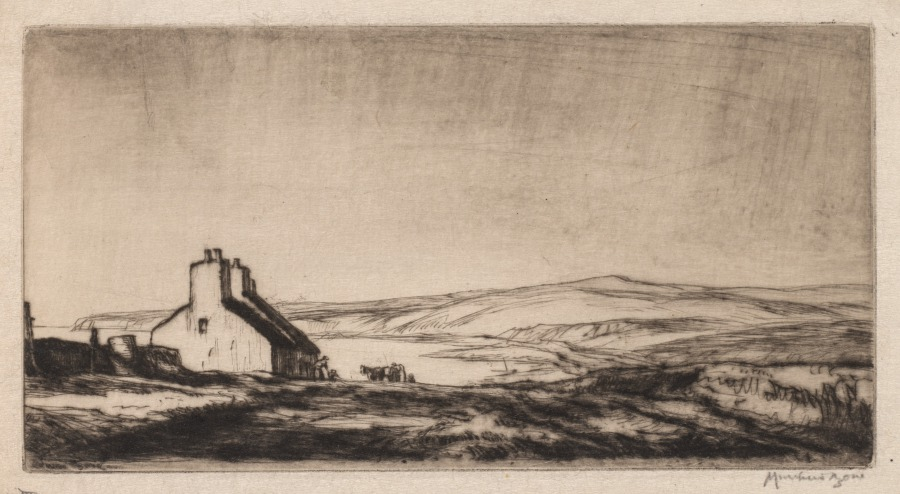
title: Third Study for 'The Ballantrae Road'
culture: Britain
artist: Muirhead Bone (British, 1876–1953)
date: 1908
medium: drypoint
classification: Print